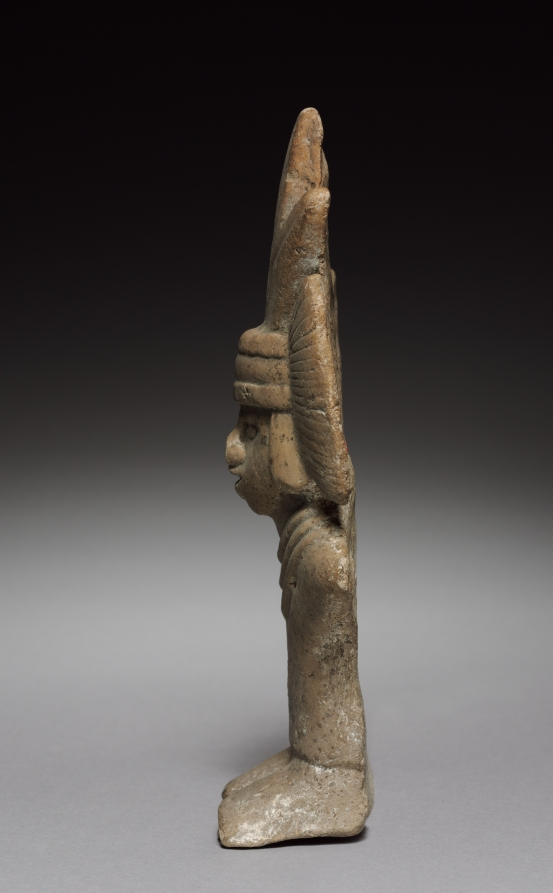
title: Figurine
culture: Mexico, Aztec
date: 1325–1521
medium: pottery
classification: Ceramic